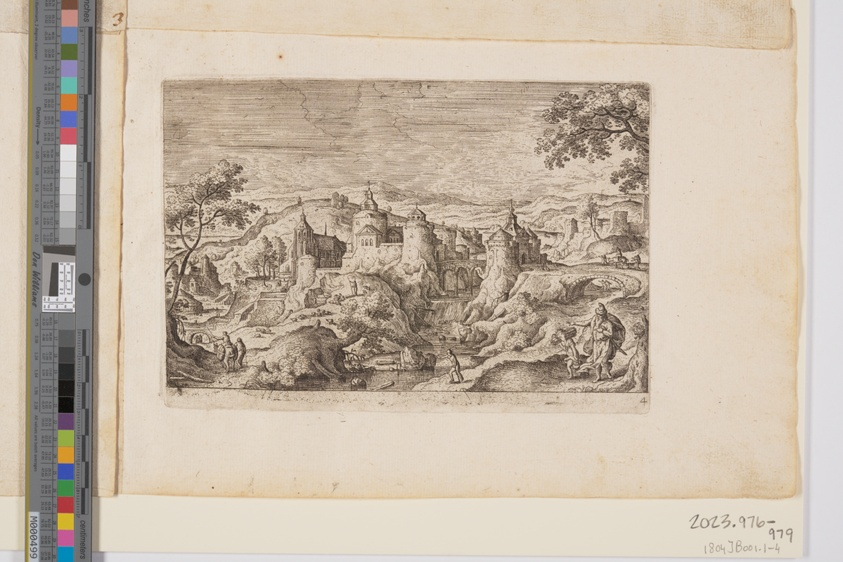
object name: Print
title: Plate 4, from Landscapes with Scenes from the Old and New Testament and Ovid’s Metamorphoses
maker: Hans Bol (Flemish, 1534–1593); published by Philip Galle (Flemish, 1537–1612)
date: 1574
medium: Etching on ivory laid paper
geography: Flanders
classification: print; paper; prints and drawing; etching